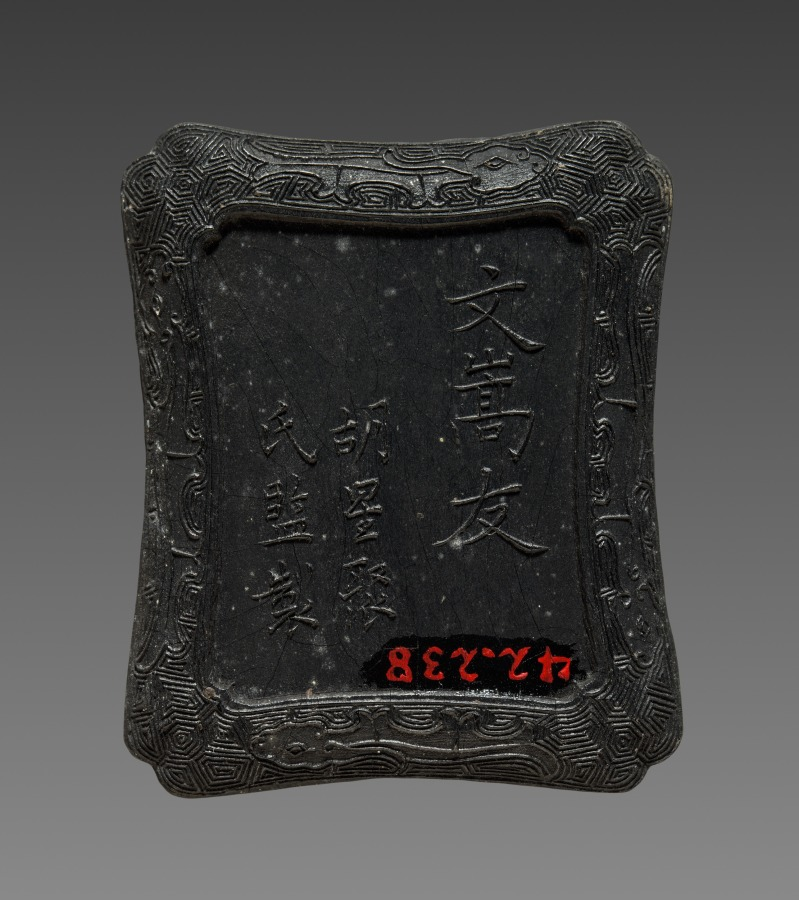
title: Ink Cake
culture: China, Qing dynasty (1644-1911)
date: 1800s-early 1900s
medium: ink cake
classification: Miscellaneous